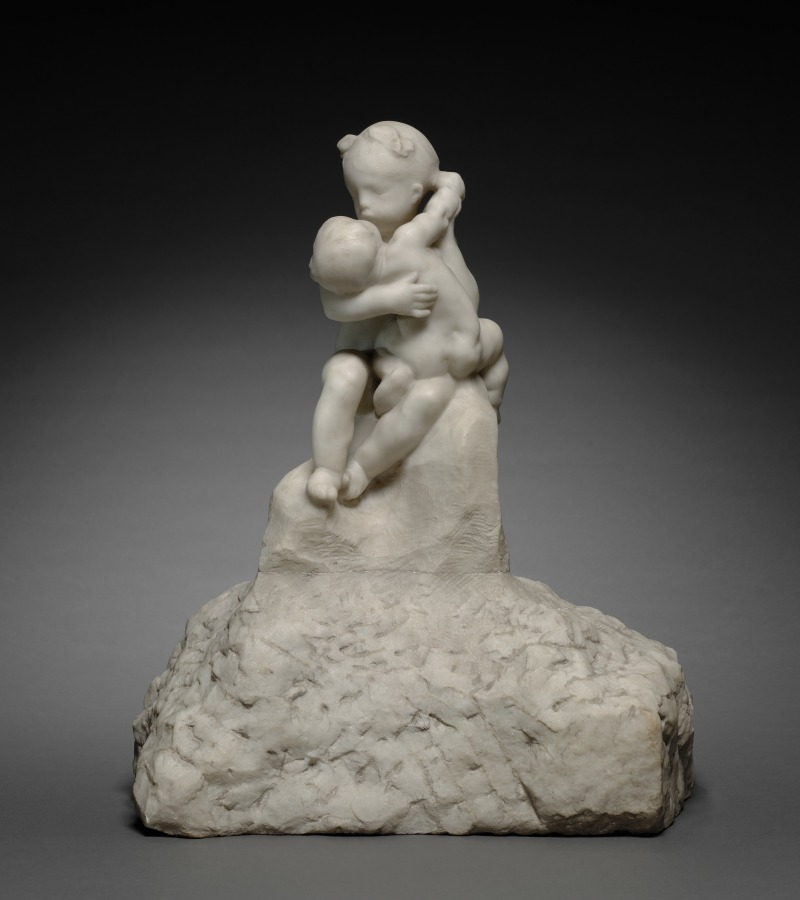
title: Little Brother and Sister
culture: France, early 20th Century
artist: Auguste Rodin (French, 1840–1917)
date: 1916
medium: marble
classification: Sculpture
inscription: Signed on base beneath figures: "A. Rodin"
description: Rodin spent years exploring new ways of representing the human emotions of love and affection experienced at different stages of life. The bodies and gestures of the children here suggest an innocent foreshadowing of the mature couple in the artist’s celebrated sculpture The Kiss of 1882. Both works feature a strong tactile contrast between the rough-hewn lower area and the smooth surfaces of the nude body above. Upwardly spiraling forms, combined with shifting areas of light and shadow, infuse the sculpture with dynamic energy.